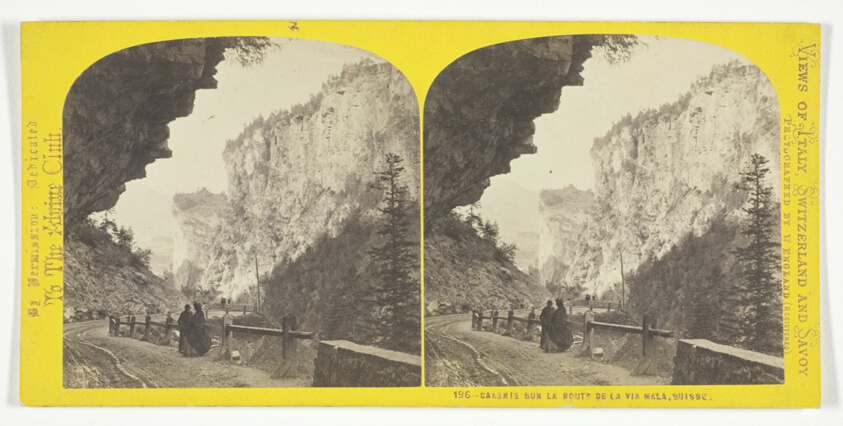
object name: Photograph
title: Galerie Sun La Route De La Via Mala, Suisse, No. 196 from the series "Views of Italy, Switzerland and Savoy"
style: 19th century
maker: William England (English, 1816-1896)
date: 1850/96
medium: Albumen print, stereo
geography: Switzerland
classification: photography; photograph; albumen silver print; stereograph (albumen)